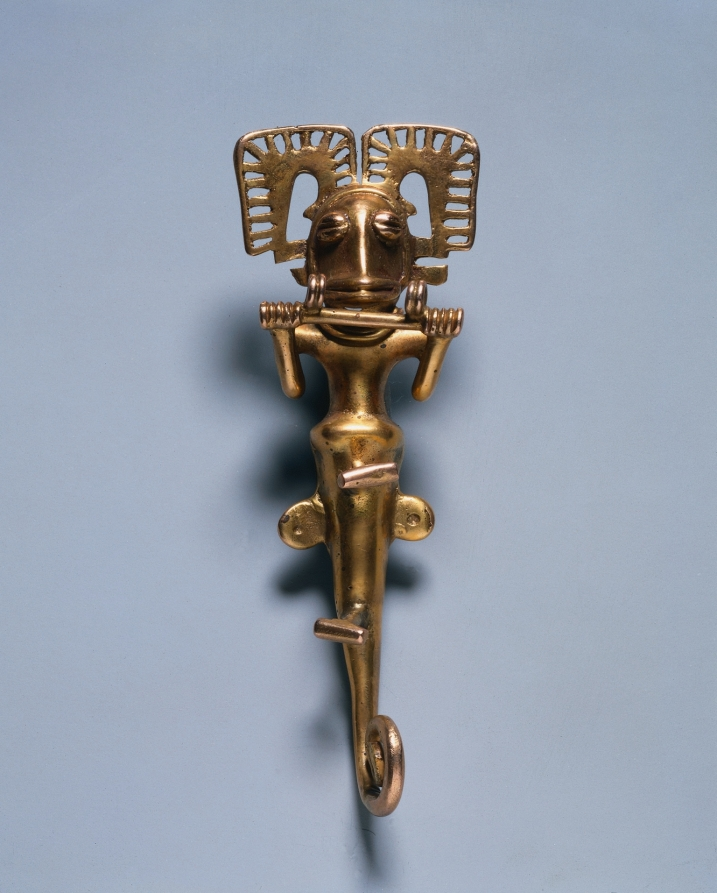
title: Pendant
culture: Panama, International Style, 5th-7th century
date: 400–700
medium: cast gold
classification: Metalwork